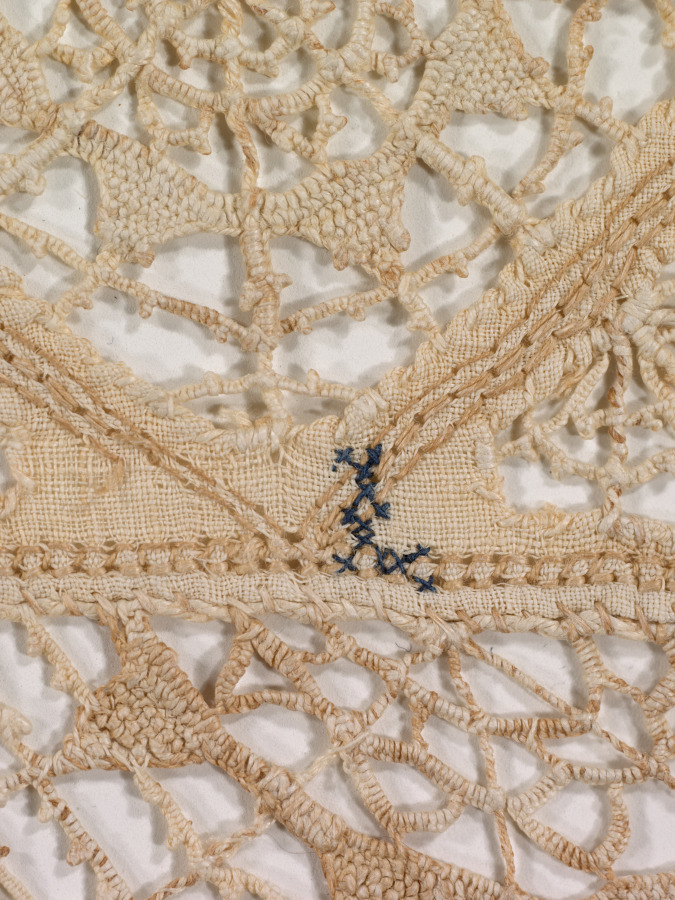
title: Lace Cloth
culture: Italy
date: 1560–1600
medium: Linen; needle lace (cutwork and reticella)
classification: Lace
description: Consisting of more than 80 squares of cutwork (a cut and embellished linen ground) and rectangles of reticella (needle lace), this luxurious cover could have been made by a single person or several people who divided the work. Close looking reveals that the cloth is made with threads of two very slightly different colors: bleached and unbleached linen. Together the sections resemble snowflakes, which are of similar shape and size but vary subtly from one another. The perplexing dark stitches in the upper left corner do not repair damage, and might be the maker’s signature.